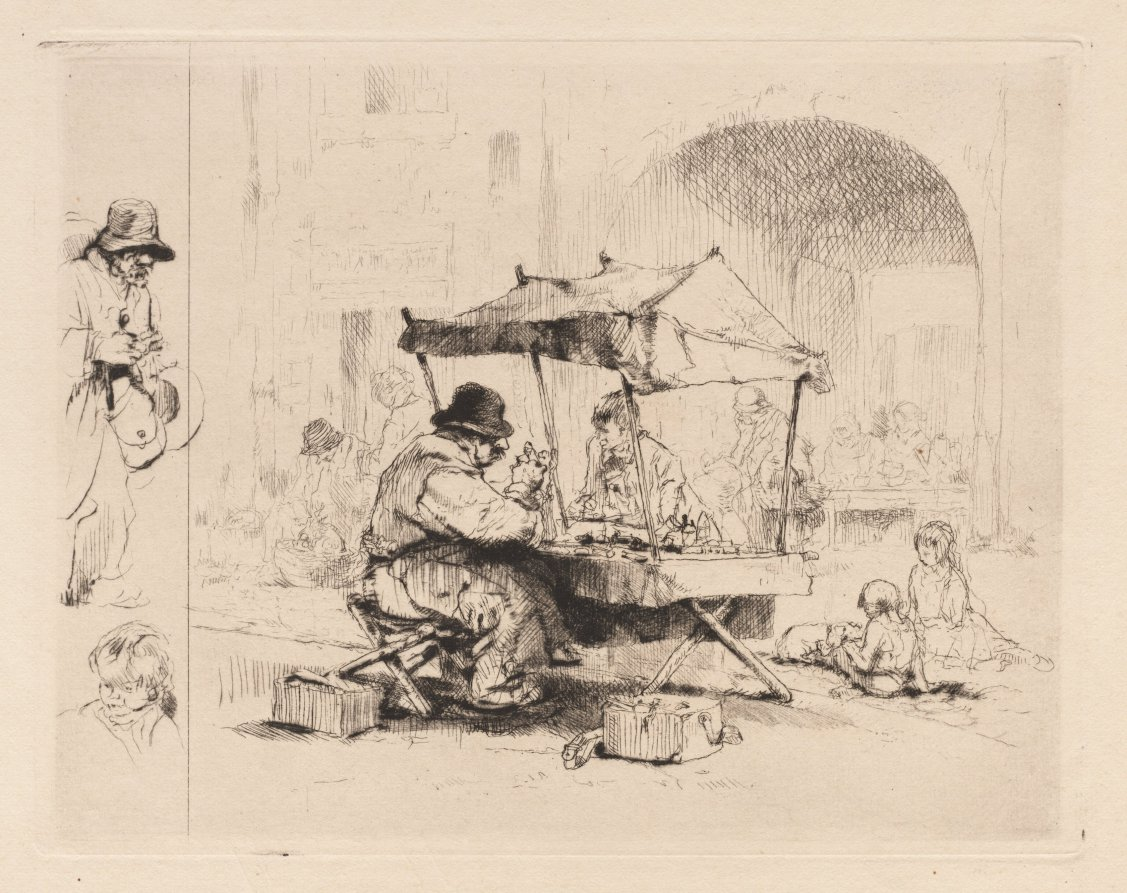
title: [Merchant in his stall with children playing]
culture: France, 20th century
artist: Auguste Brouet (French, 1872–1941)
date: c. 1902–41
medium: etching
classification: Print